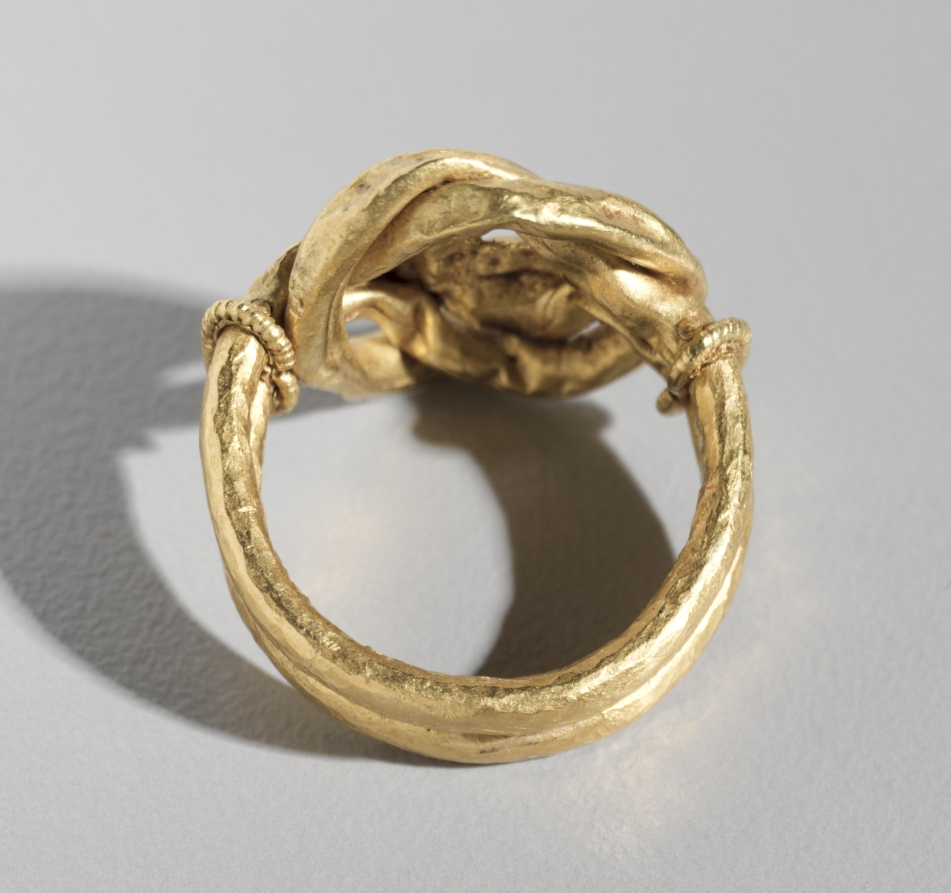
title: Ring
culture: Greece or Italy, Rome (?)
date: before 1916 this is common era, not BCE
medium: gold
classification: Jewelry